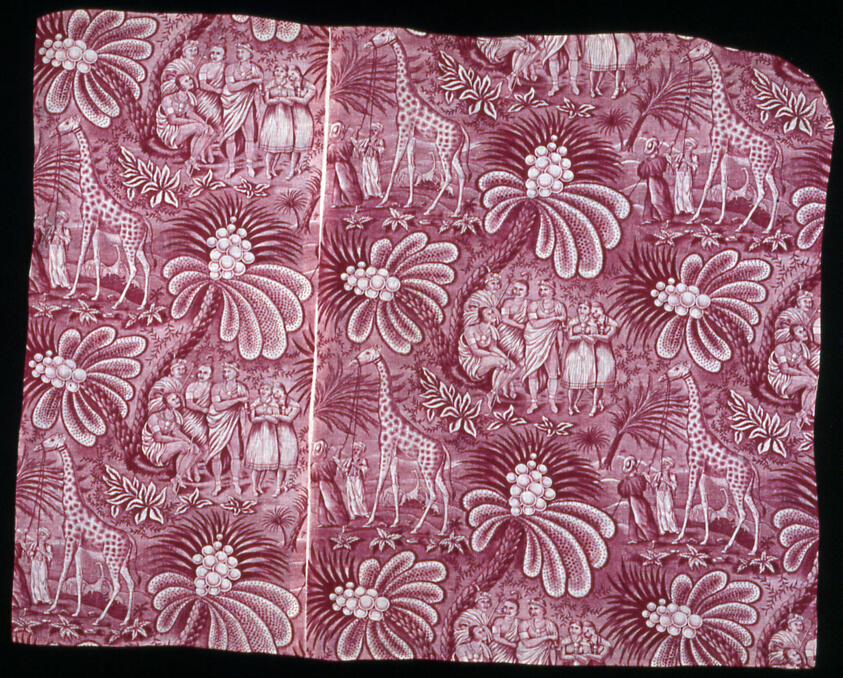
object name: Textile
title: Panel (Furnishing Fabric)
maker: France, Alsace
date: c. 1800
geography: France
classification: textile; weaving - printed; furnishing textile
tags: circles